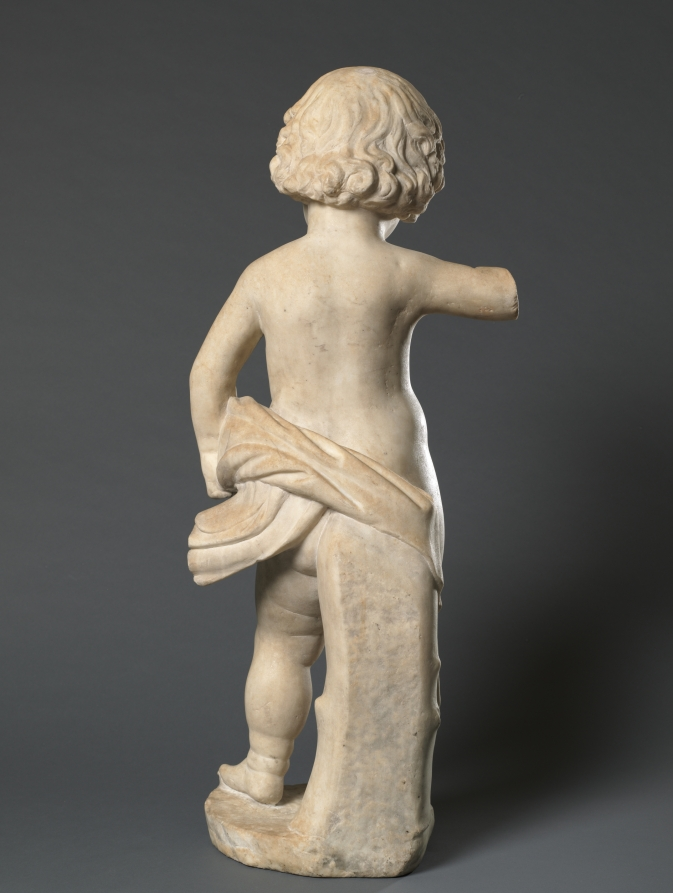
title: Christ Child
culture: Italy, Florence, 15th century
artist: attributed to Michele (di Luca) Marini (Italian)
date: c. 1490–1500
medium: marble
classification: Sculpture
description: This sculpture is an enlarged version of Desiderio da Settignano's figure of about 1460 at the top of his tabernacle in the Church of San Lorenzo in Florence. There are many replicas of Desiderio's work. This example is an especially fine one, undoubtedly intended for the interior of a church.